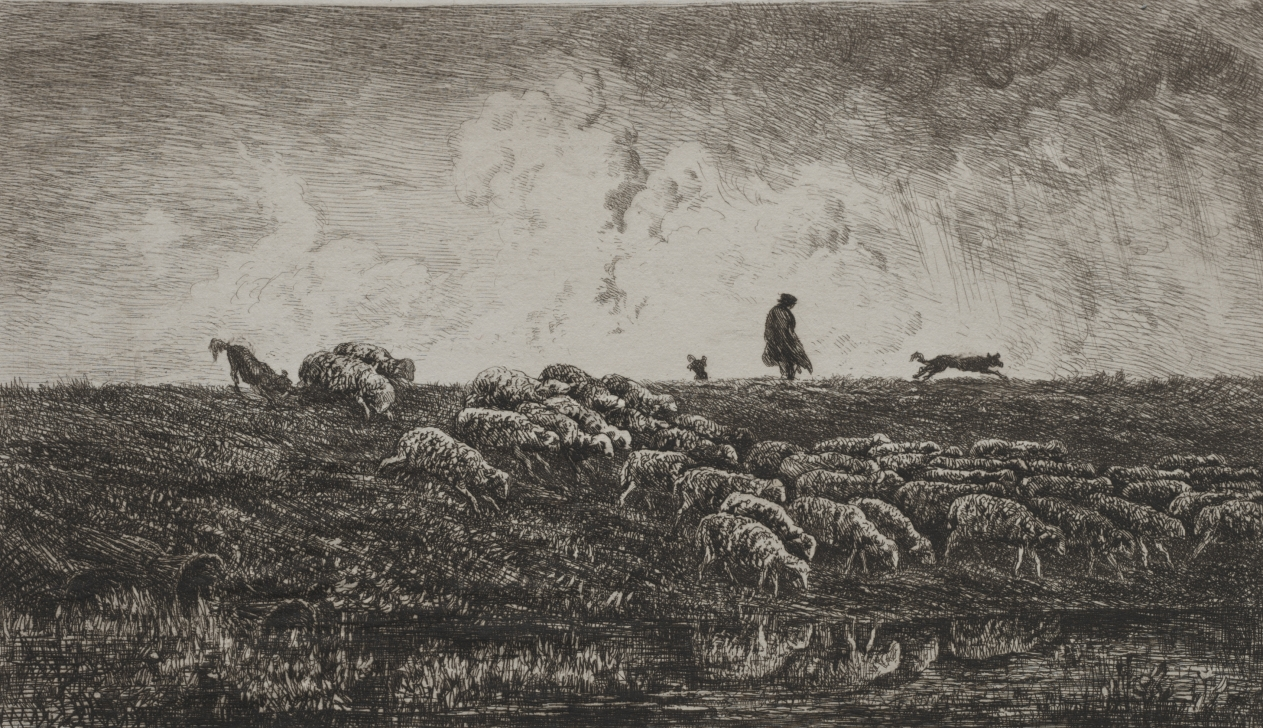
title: The Shower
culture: France, 19th century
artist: Charles François Daubigny (French, 1817–1878)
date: c. 1851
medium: etching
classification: Print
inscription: signed, lower left, in plate: Daubigny